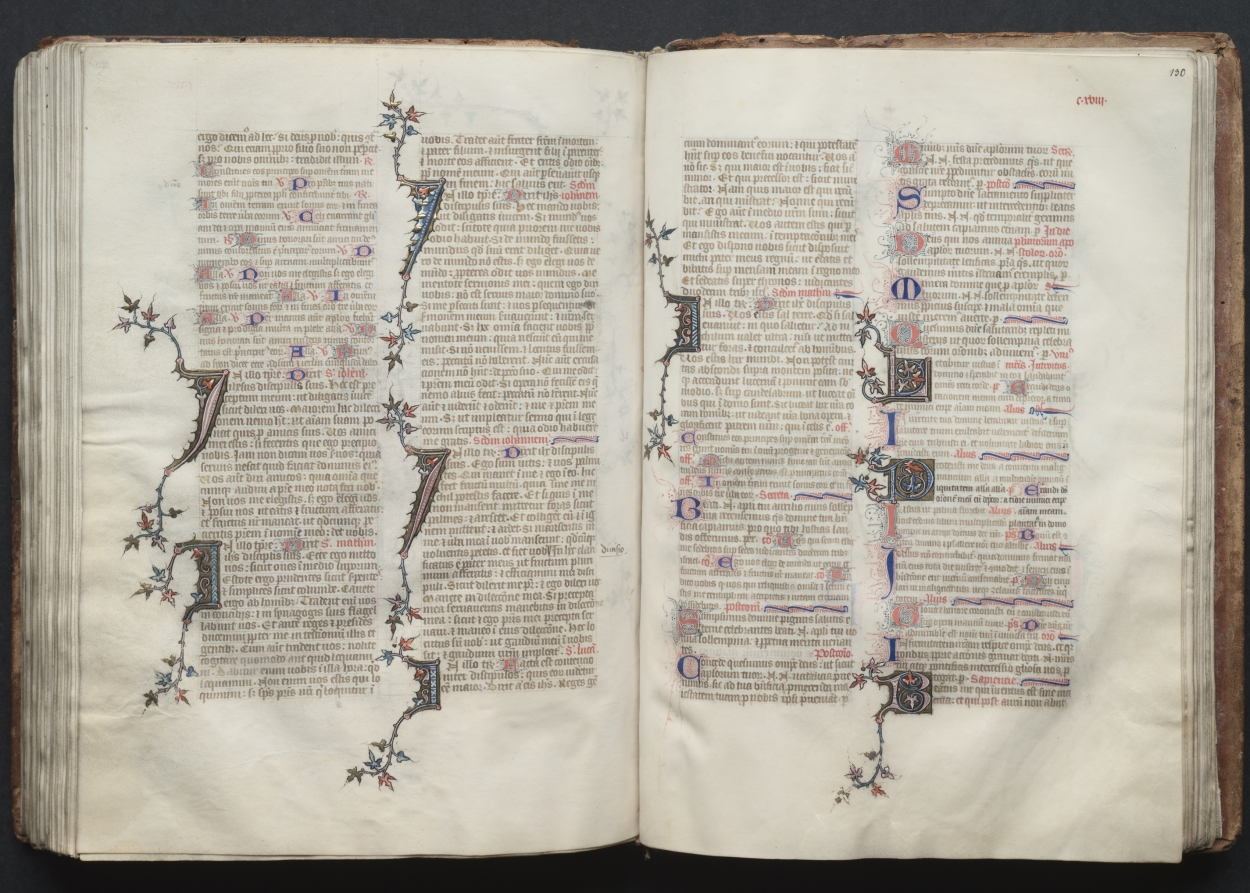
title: The Gotha Missal: Fol. 130r, Text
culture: France, Paris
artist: Master of the Boqueteaux (French)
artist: and Workshop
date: c. 1375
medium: ink, tempera, and gold on vellum; blind-tooled leather binding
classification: Bound Volume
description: The style and quality of this manuscript's decoration is typical of deluxe Parisian books made for aristocratic or royal patrons. Most of the book's decoration appears to be the work of the Master of the Boqueteaux, an artist active at the court of King Charles V (died 1380). His style was apparently shared by a number of book illuminators working in and around Paris. It is very possible that the Gotha Missal belonged to Charles V, but is not provable because the manuscript has no royal portraits and lacks a colophon. Given the book's magnificent decoration, however, it would seem that it was produced for a Valois prince, if not for the king himself. The manuscript receives its name from the German dukes of Gotha, its later owners.